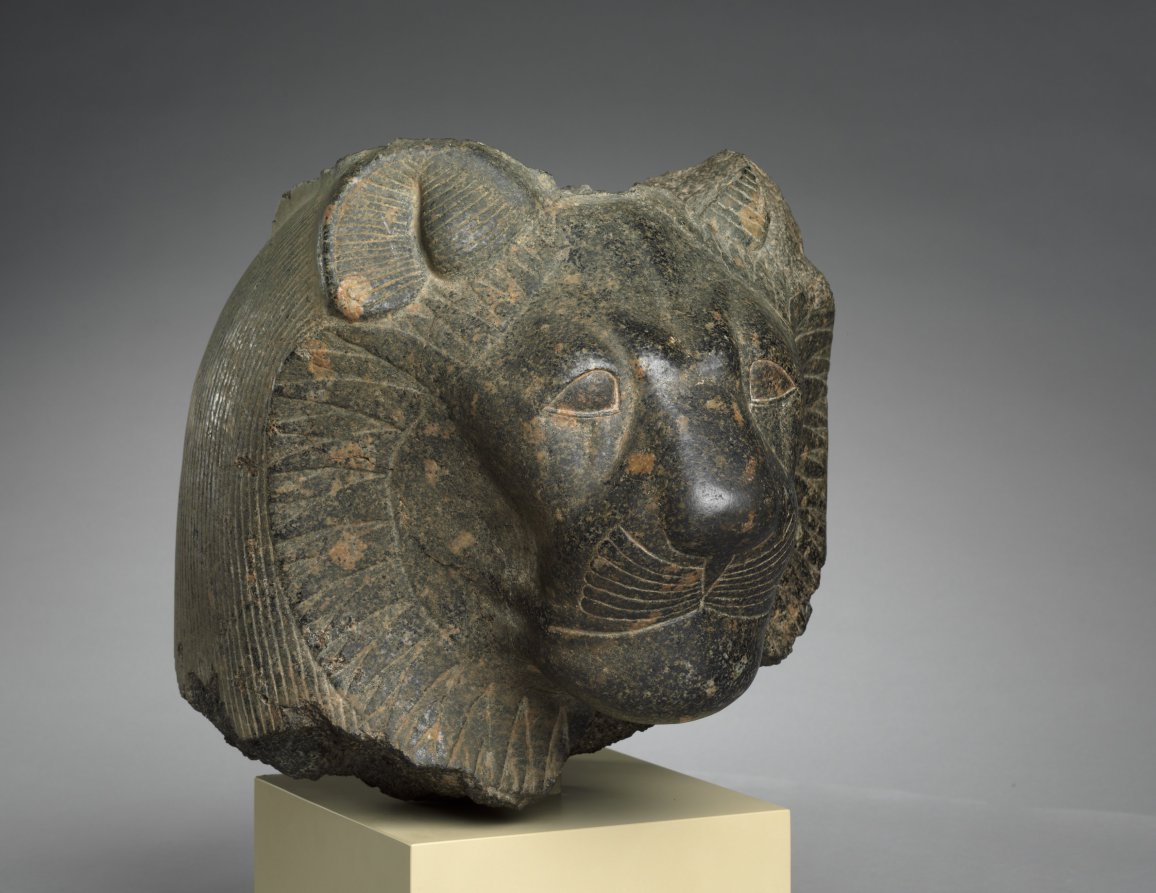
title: Head of Sekhmet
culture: Egypt, Thebes(?), New Kingdom (1540–1069 BCE), Dynasty 18, reign of Amenhotep III (1390–1352 BCE)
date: c. 1391–1353 BCE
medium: granodiorite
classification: Sculpture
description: This lioness head once belonged to a grand statue of the goddess Sekhmet, "the powerful one," probably seated and wearing a tight dress. Possibly appealing to her healing aspect, Pharaoh Amenhotep III, often described as “beloved of Sekhmet,” commissioned and dedicated hundreds of large granodiorite Sekhmet sculptures in his Theban mortuary temple. Thus, this head likely comes from Thebes, perhaps later moved across the Nile—like many such sculptures—to the temple of Mut, a related deity, at Karnak. Behind her stylized ruff, Sekhmet wears a wig, once crowned with a sun disk and uraeus, the stylized cobra symbolizing royal or divine power.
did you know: Amenhotep III may have dedicated 730 statues of Sekhmet, two for each day of the year.